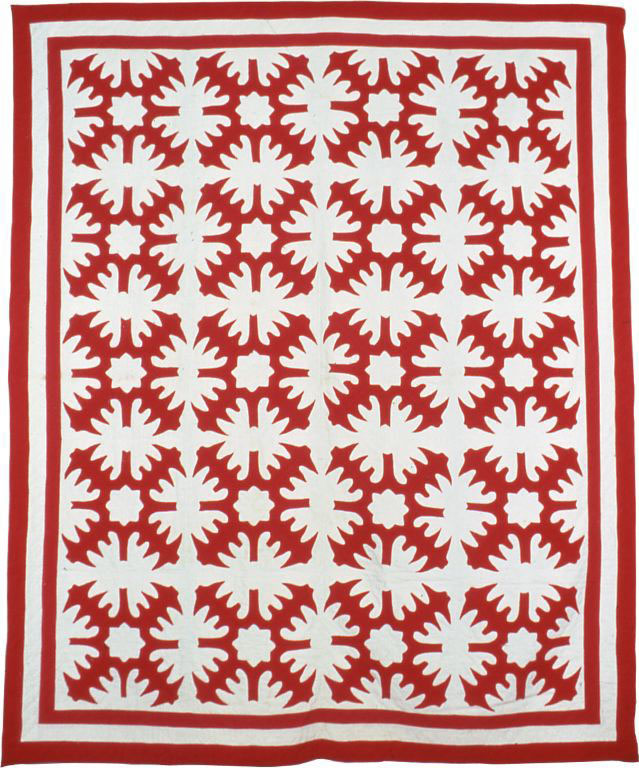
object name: Textile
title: Bedcover (Star and Oak Leave Motif)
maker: United States, Wisconsin, Rochester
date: 1880's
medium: Cotton, plain weave, appliquéd and pieced with cotton, plain weave; quilted; backed with cotton, plain weave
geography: Wisconsin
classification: textile; needlework - quilt